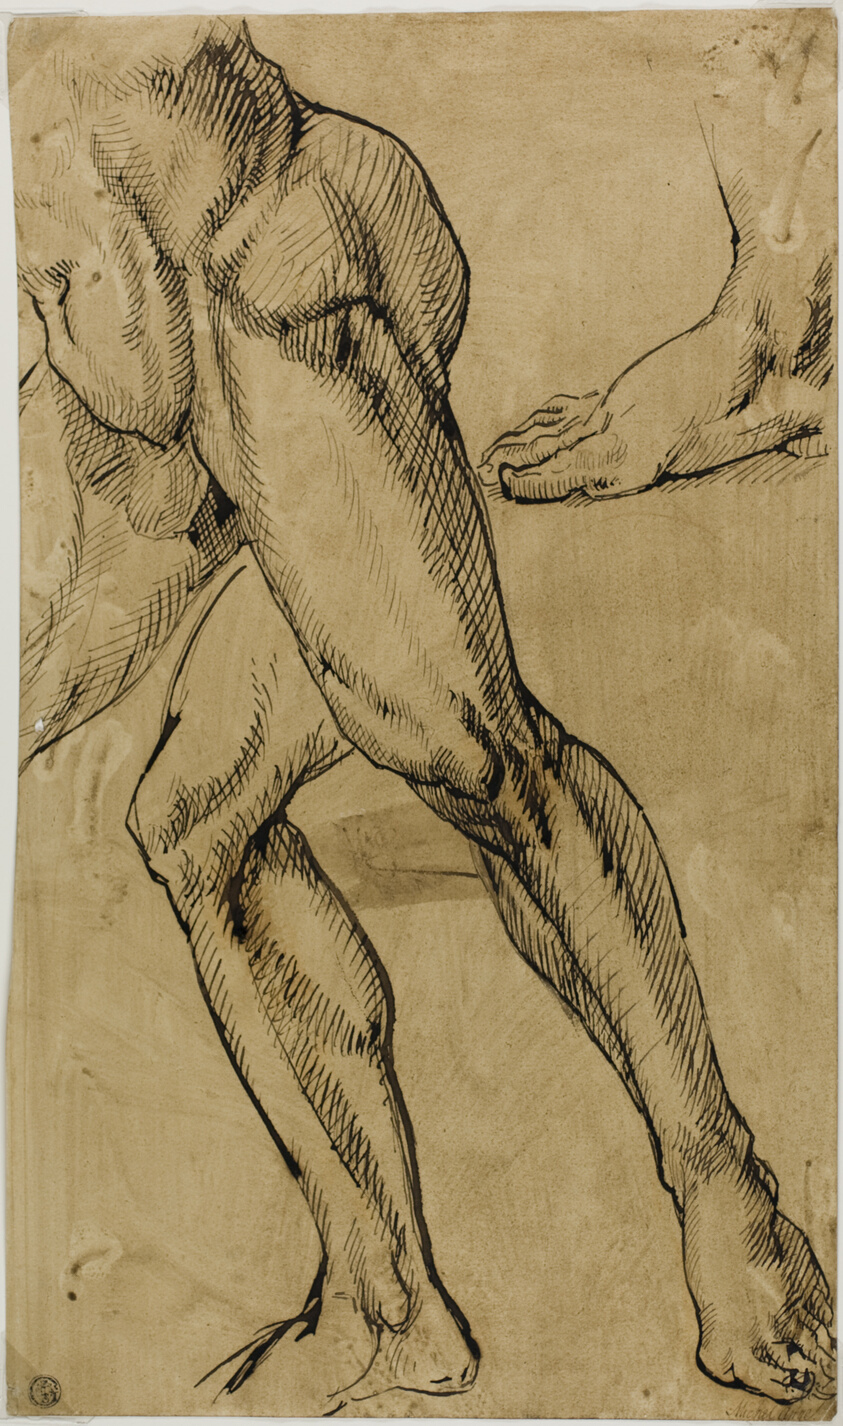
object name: Drawing and Watercolor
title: Legs and Feet of Male Nude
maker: Possibly after Michelangelo Buonarroti; Italian, 1475-1564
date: 1812/50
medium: Pen and brown ink, on cream wove paper prepared with a pale brown wash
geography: Italy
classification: pen and ink drawings; drawings (visual works); prints and drawing